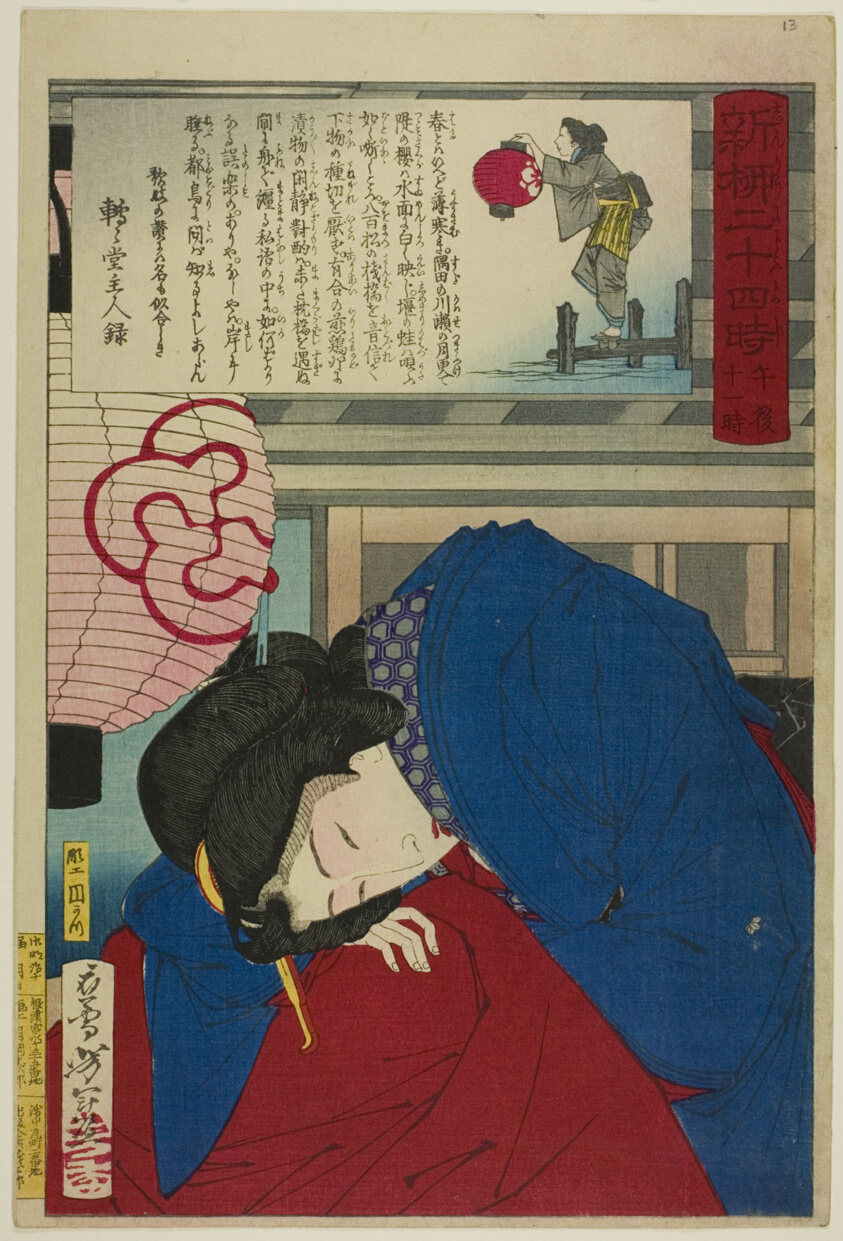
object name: Print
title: 11 p.m., from the series "Twenty-Four Hours at Shinyanagi (Shinyanagi nijuyoji)"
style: Japanese (culture or style)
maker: Tsukioka Yoshitoshi (Japanese, 1839–1892)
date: 1880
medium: Color woodblock print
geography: Japan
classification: woodblock print; print